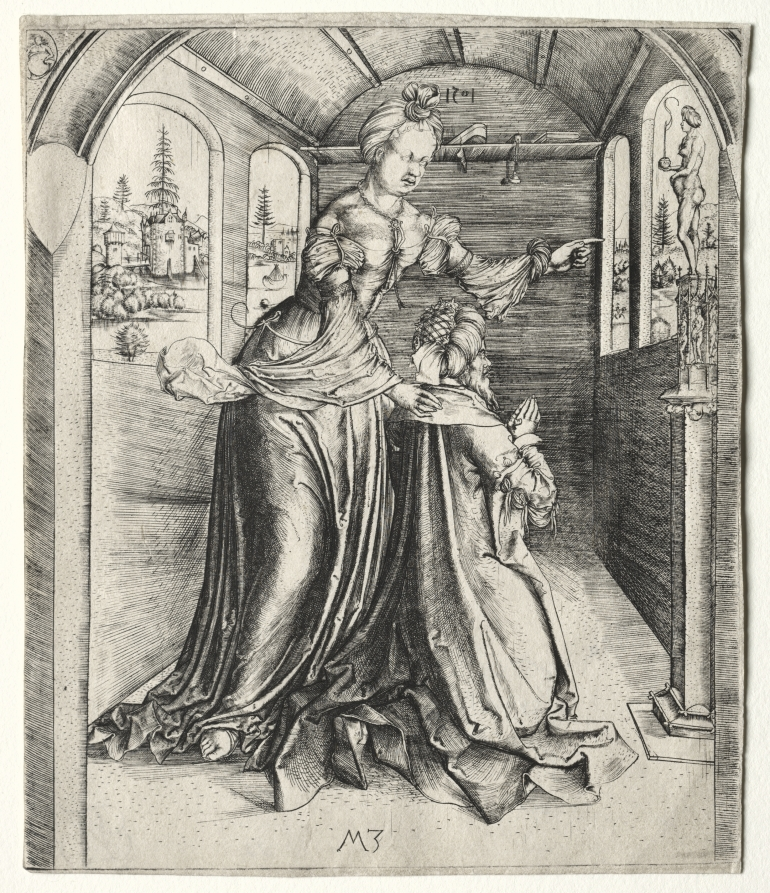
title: Solomon Worshipping Idols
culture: Germany, early 16th Century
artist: Master MZ (German)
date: 1501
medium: engraving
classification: Print